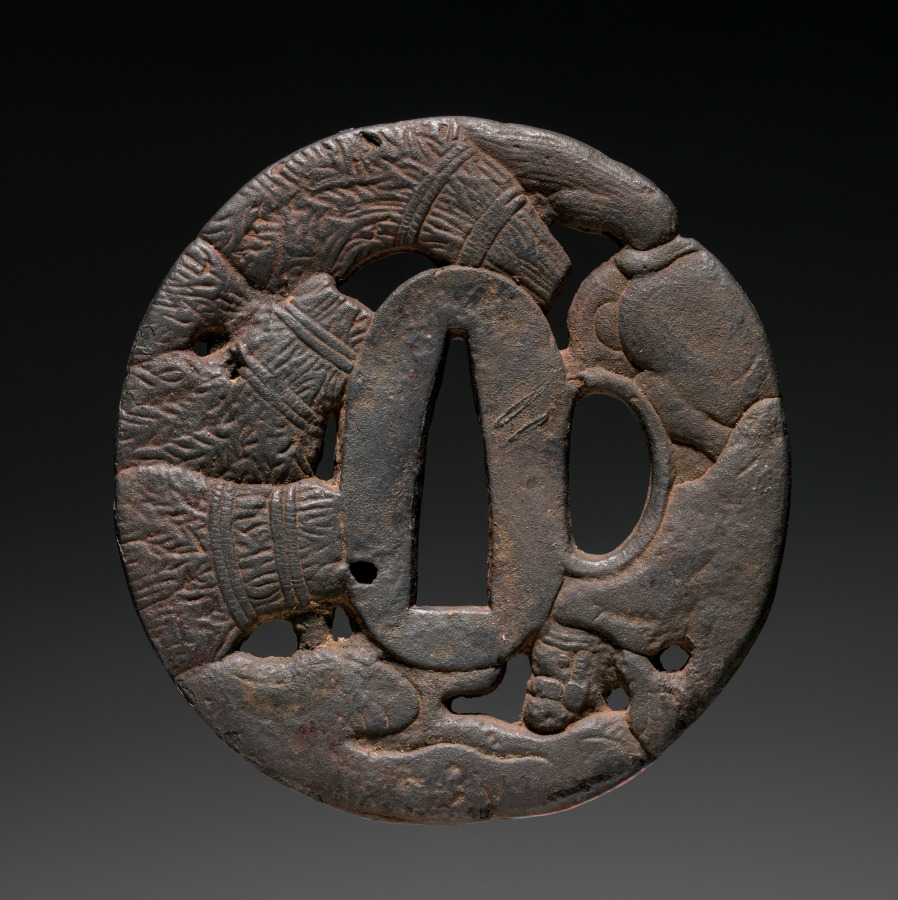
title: Sword Guard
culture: Japan, Edo period (1615–1868)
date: early to mid-1800s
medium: iron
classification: Arms and Armor